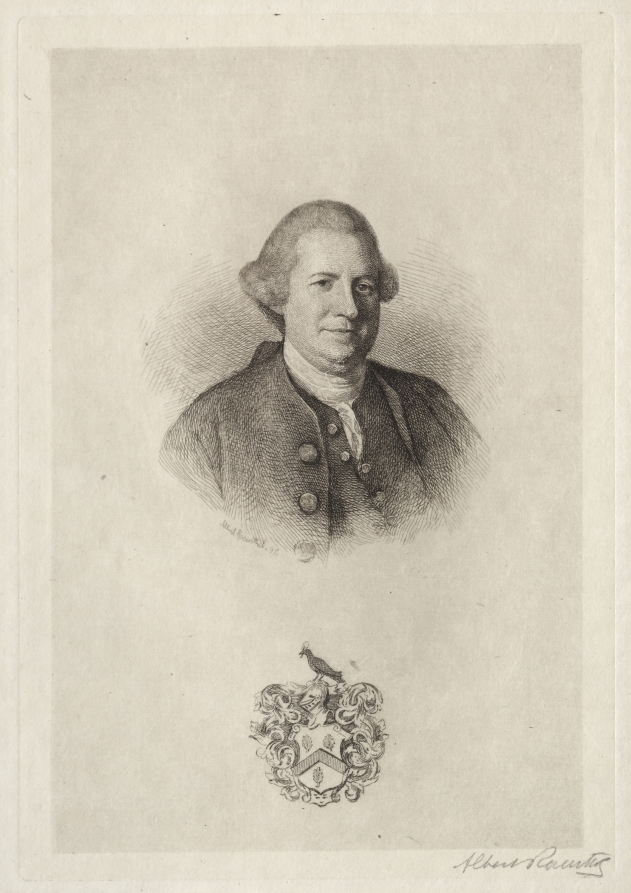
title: Ed. Shippen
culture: America, late 19th Century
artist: Albert Rosenthal (American, 1863–1939)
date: 1897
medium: etching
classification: Print